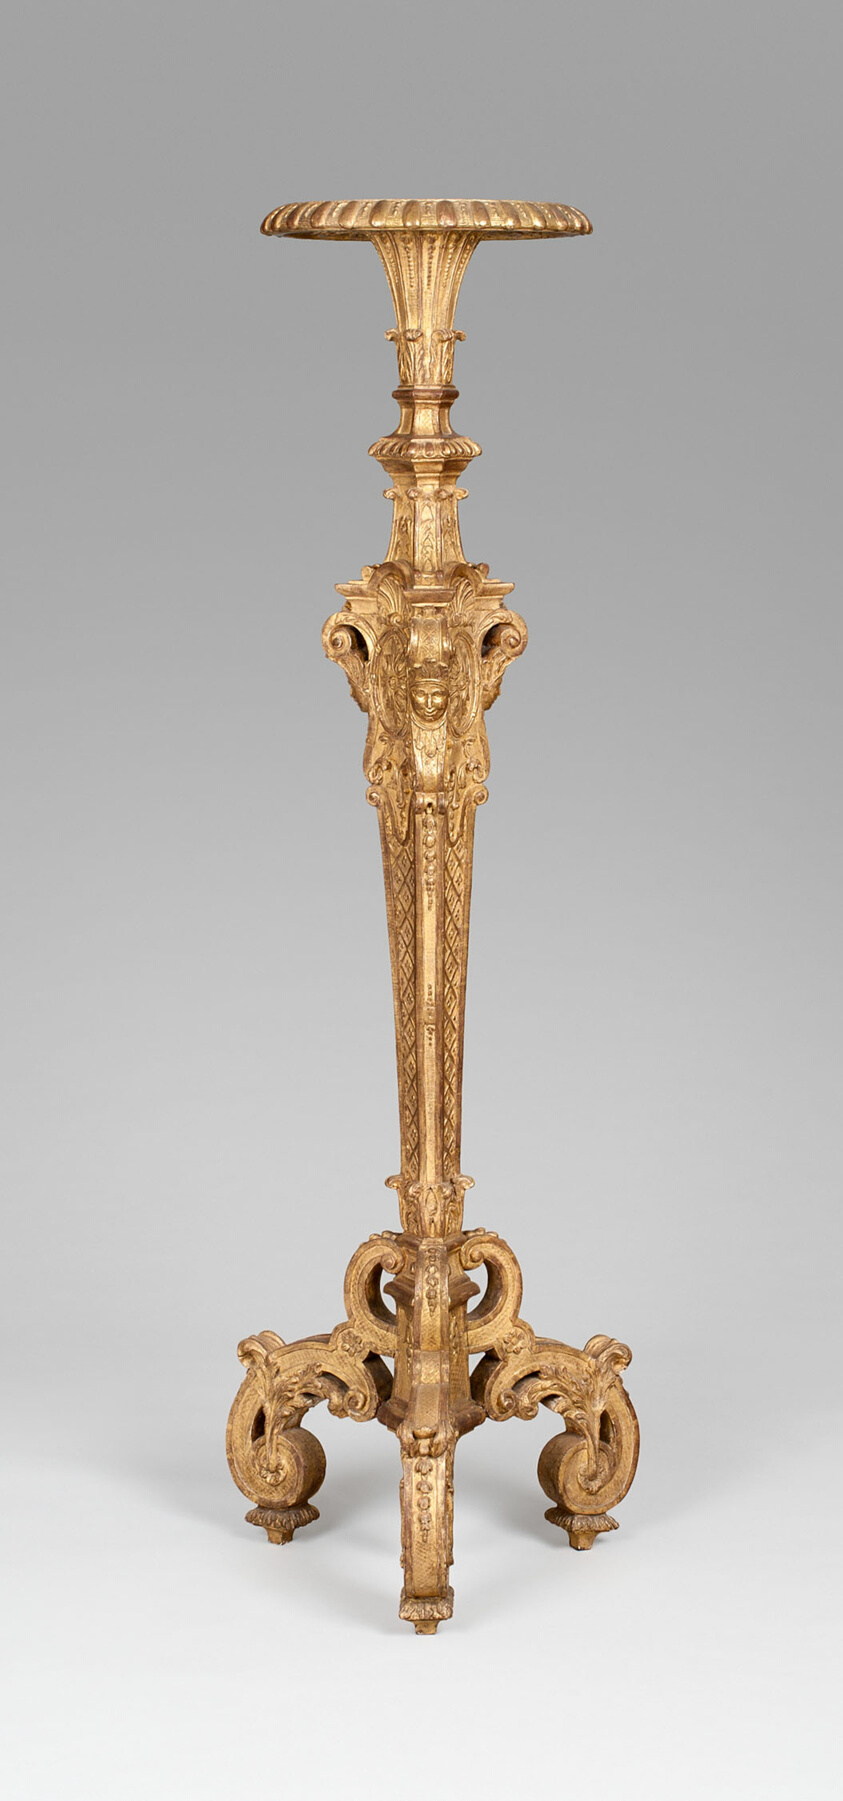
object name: Furniture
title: Stand for Candelabrum (Torchère)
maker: France, Paris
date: 1685–90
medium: Caned, gessoed, and gilded oak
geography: France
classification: torchère (stand); stand; lighting device; furniture; european decorative arts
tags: furniture